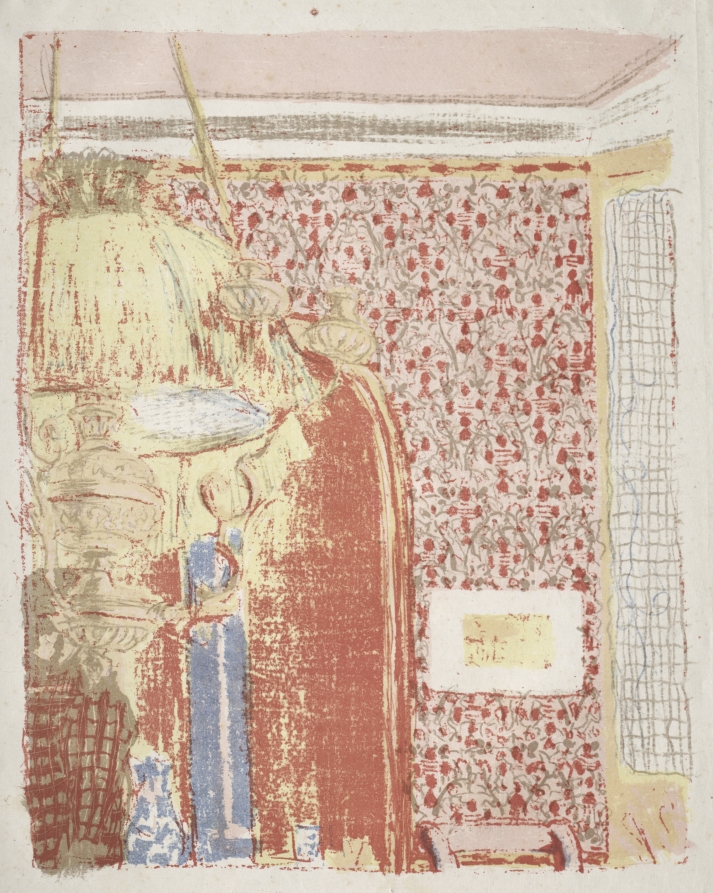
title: Interior with Pink Wallpaper II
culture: France, 19th century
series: Landscapes and Interiors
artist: Édouard Vuillard (French, 1868–1940)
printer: Auguste Clot (French, 1858–1936)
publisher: Ambroise Vollard (French, 1867–1939)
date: 1899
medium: color lithograph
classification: Print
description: The optical beauty of the patterning and luscious color of Interior with Wallpaper I, II, and III distracts from their ambivalent undercurrents. Across the three sheets, Vuillard creates an airless enclosure in which the wallpaper replicates itself, metastasizing across the surface and threatening the figures partially glimpsed through interior doors. Hidden figures recur in Vuillard’s work, adding an element of the uncanny to familiar settings.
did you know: This soft, pink interior scene likely depicts one of several Parisian apartments Vuillard shared with his mother and older sister.